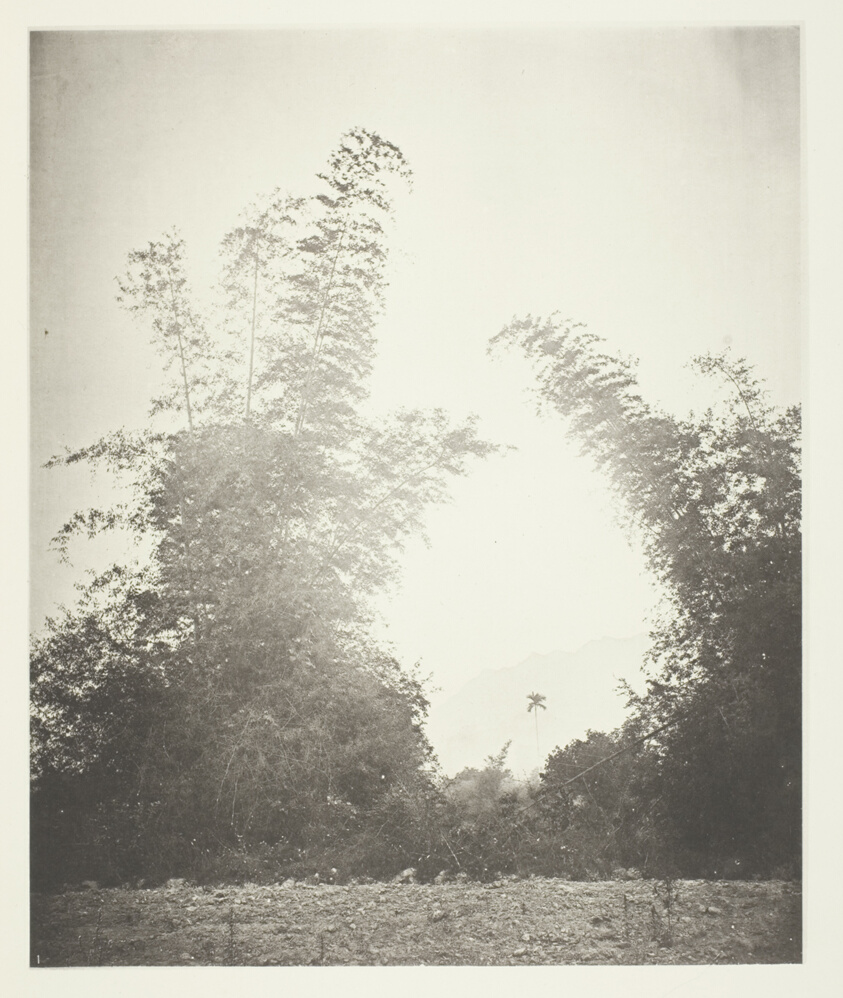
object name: Photograph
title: Bamboos at Baksa, Formosa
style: 19th century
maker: John Thomson (Scottish, 1837–1921)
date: c. 1868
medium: Collotype, pl. I from the album "Illustrations of China and its People, Volume II" (1873)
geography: Scotland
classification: photography; photograph